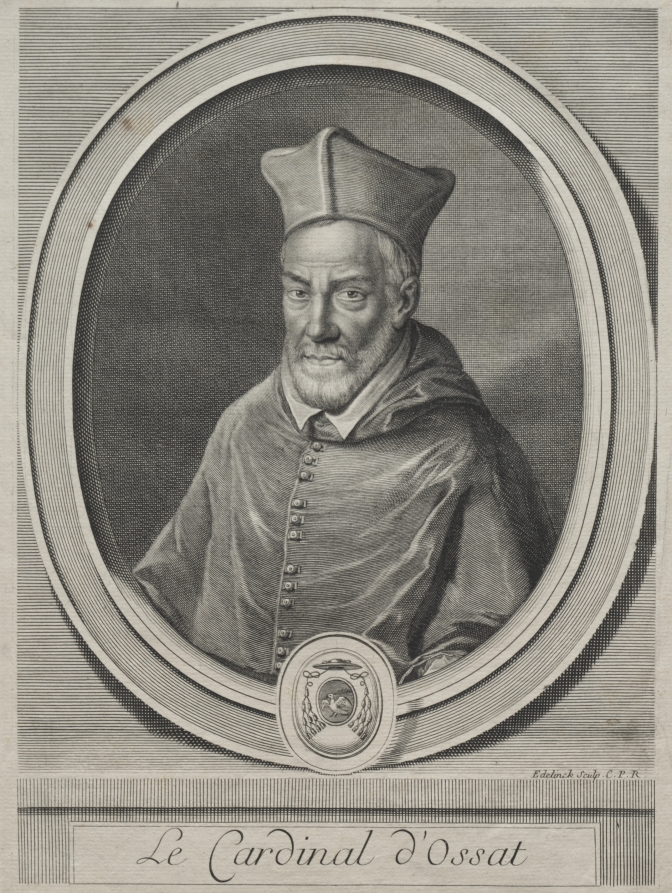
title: Cardinal Arnaud d'Ossat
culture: France, 17th century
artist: Gerard Edelinck (French, 1640–1707)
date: c. 1670–1700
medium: engraving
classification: Print